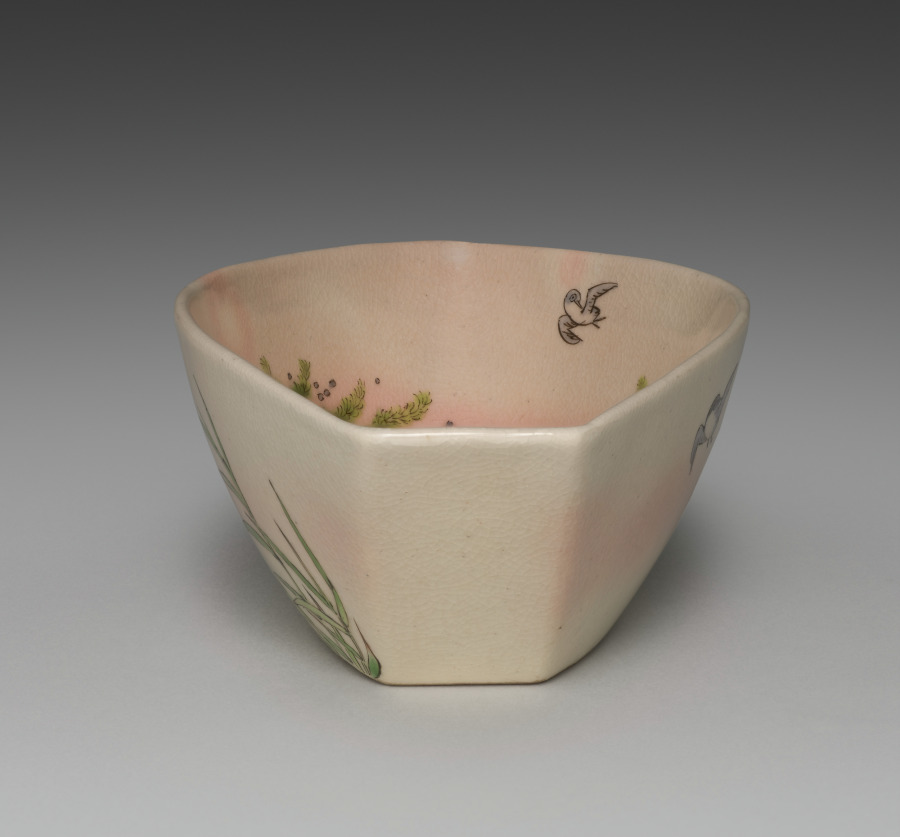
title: Boat-Shaped Bowl with Plovers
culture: Japan, Meiji period (1868–1912)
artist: Seifū Yohei III (Japanese, 1851–1914)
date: 1893–97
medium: Stoneware with crackled glaze and overglaze color enamel and gold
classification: Ceramic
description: Overglaze color enamels create a seascape made complete by the bowl’s boat shape. The bowl’s form inserts a human presence into the scene, much in the way rusu mōyō is used in paintings to suggest people just out of view. Rusu mōyō is a pictorial device by which the presence of someone physically absent from an image is conveyed through the depiction of clothing or other items. The inside of the bowl has a scene of plovers flying through the sky over a profusion of seaweed in sand below. In addition to the black, gray, and green of the overglaze elements, warm pink banding and mottling in the clay come through the glaze and are remarkably effective at suggesting the seashore.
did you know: On the outside of the bowl, on each side, birds fly about grasses in search of a meal.